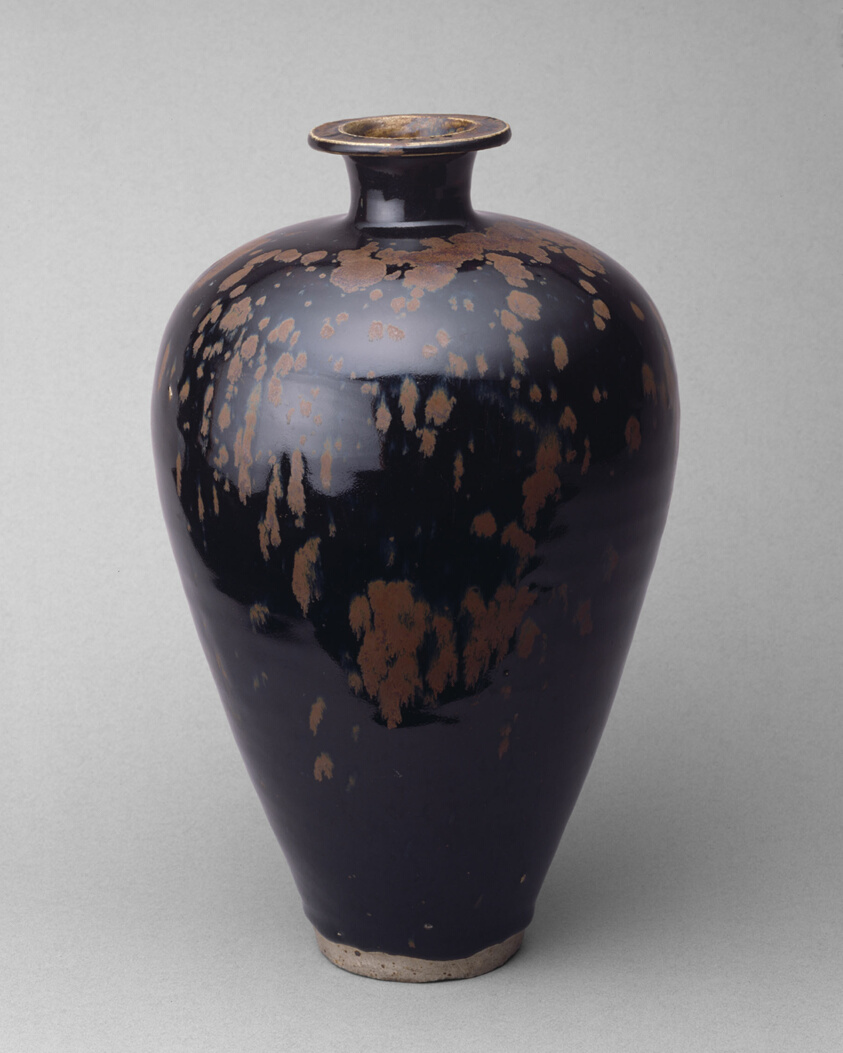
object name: Decorative Arts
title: Ovoid Bottle with “Partridge-Feather” Mottles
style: Chinese (culture or style)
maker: China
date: Northern Song dynasty (960–1127), 11th/early 12th century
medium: Cizhou ware; stoneware with overglaze slip decoration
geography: China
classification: vase; vessel; stoneware; ceramics; asian art; decorative arts